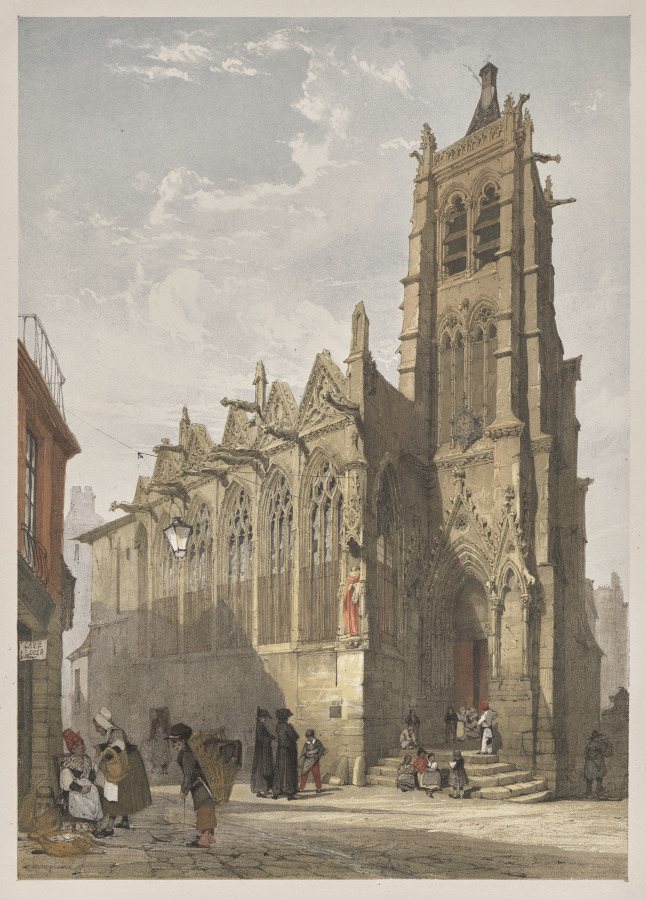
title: Picturesque Architecture in Paris, Ghent, Antwerp, Rouen: St. Severin, Paris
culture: England, 19th century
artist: Thomas Shotter Boys (British, 1803–1874)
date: 1839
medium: lithograph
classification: Portfolio